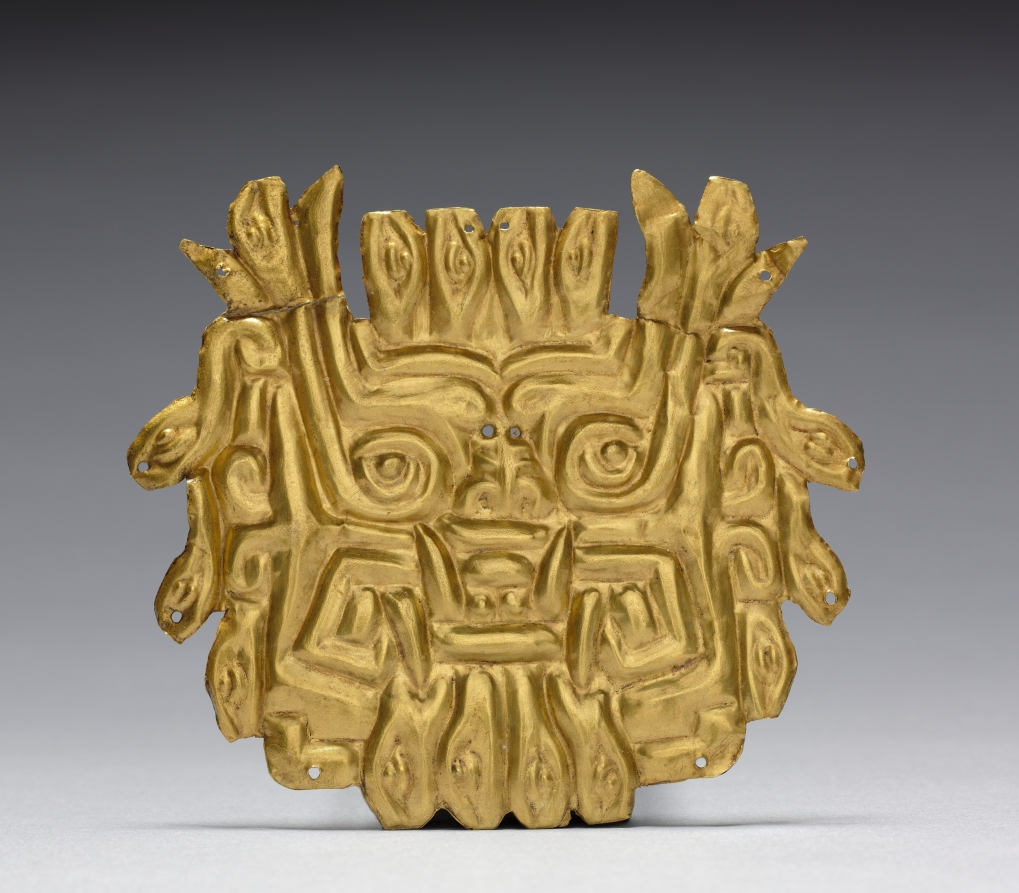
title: Plaque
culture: Peru, North Coast, Chongoyape(?), Chavín style (900-200 BCE)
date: c. 500–200 BCE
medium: hammered and cut gold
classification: Jewelry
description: These plaques showing a powerful Chavín deity may come from a group of gold objects found in a lavish tomb in the 1920s. One is shaped as the deity’s fanged head, its fur transformed into sixteen serpents that edge the plaque. On the other, the deity’s visually elusive body also appears: the clawed hands over the chest may clutch a horizontal staff, an emblem of authority; across the waist is a belt that sprouts serpents; and beneath are the legs and feet, which stand atop fanged masks.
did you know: Hammered gold ornaments have been produced in the Andes since 1500 BCE.